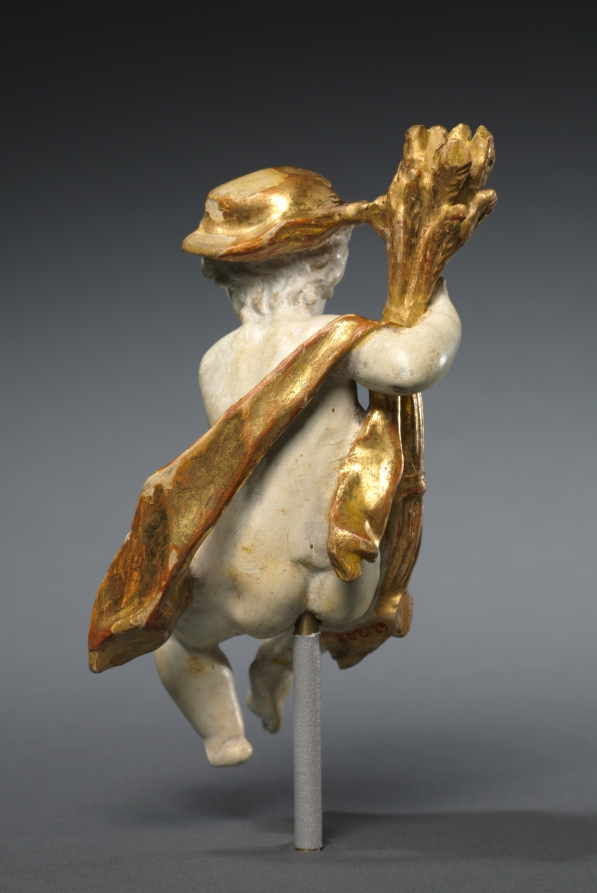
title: Putto as Summer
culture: Germany, 18th century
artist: Ferdinand Tietz (Austrian, 1708–1777)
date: c. 1765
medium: painted and gilded wood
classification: Sculpture